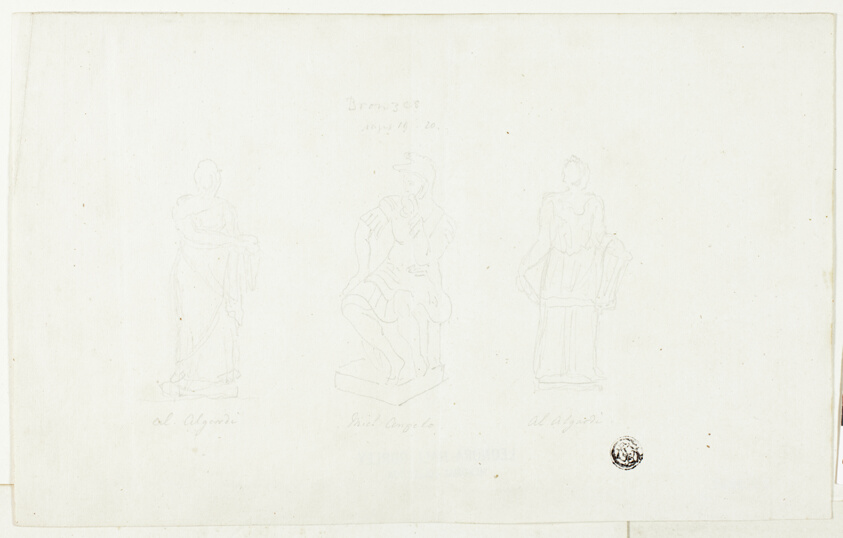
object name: Drawing and Watercolor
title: Three Large Statues by Algardi and Michelangelo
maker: Unknown Artist; British, n.d.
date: 19th century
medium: Graphite on ivory wove paper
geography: United Kingdom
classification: graphite; drawings (visual works); prints and drawing